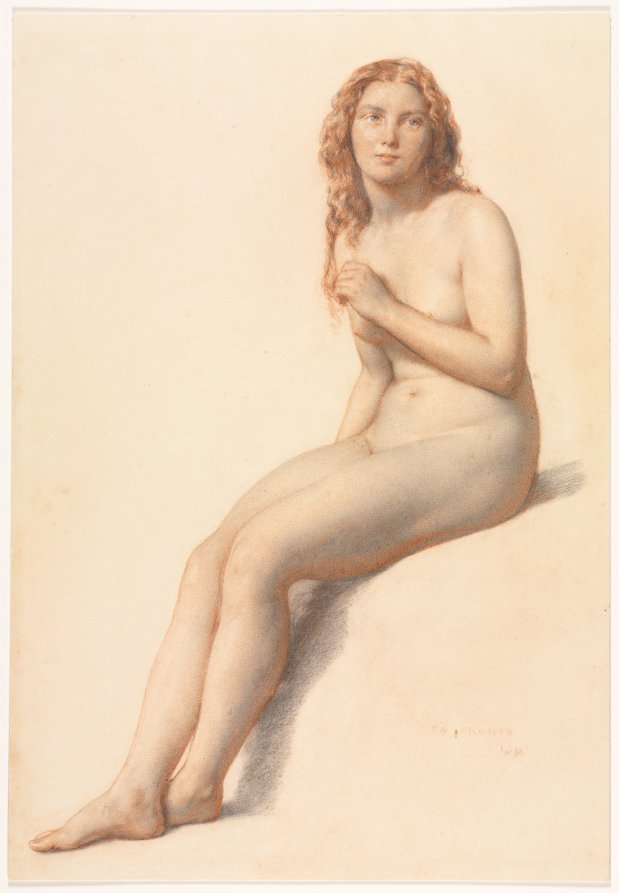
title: Female Nude, Seated, Three Quarter View from Front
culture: England, 19th century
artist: William Mulready (British, 1786–1863)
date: 1859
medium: black and red crayon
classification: Drawing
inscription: inscribed, in red chalk (rubbed), at lower right: RA [?/?] 1859 / WM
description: For William Mulready, drawing was a lifelong preoccupation. This sheet was drawn from a model in the Royal Academy’s life school when the artist was 73. He was one of the academy’s most devoted teachers, positioning the model for his students and then drawing alongside them. Closely observed and meticulously crafted, the work attests to Mulready’s consummate skill as a draftsman.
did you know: In 1863, William Mulready testified before the Royal Commission Enquiry into the Royal Academy in support of the life class as central to academic education.